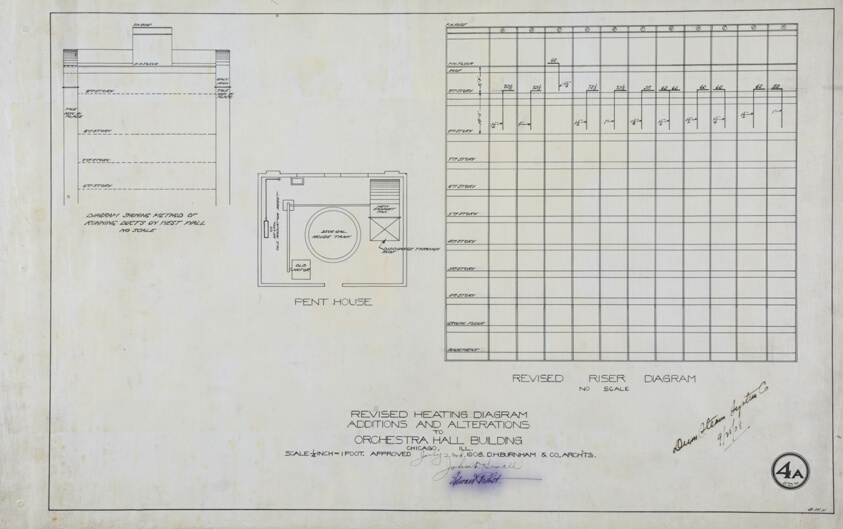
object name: Architectural Drawing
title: Orchestra Hall Heating Revisions, Chicago, Illinois, Diagrams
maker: D.H. Burnham & Company; American, 1896–1912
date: 1908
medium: Ink on linen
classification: architecture; architectural drawing